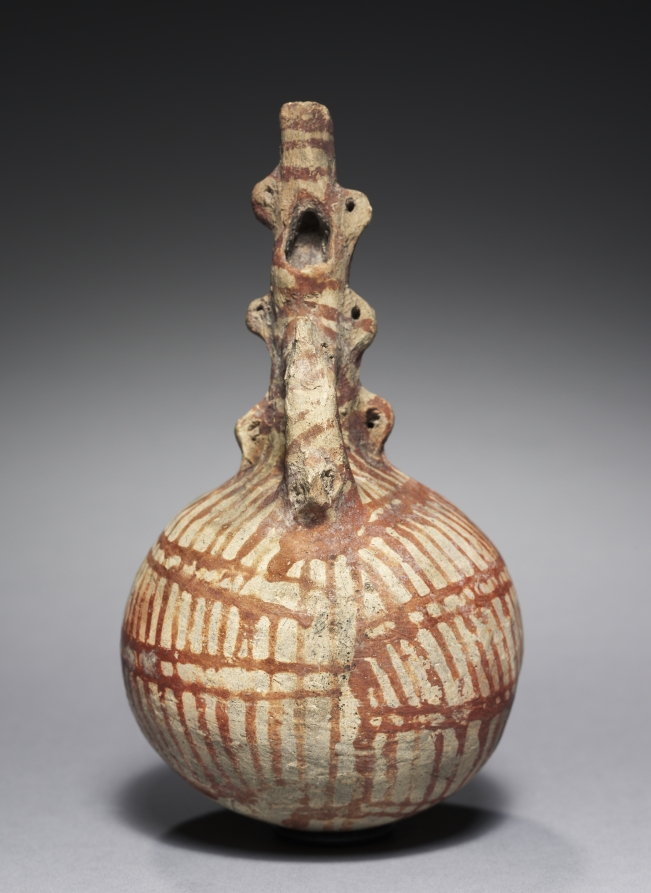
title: Jug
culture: Cyprus, middle Cypriot III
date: c. 1725–1600 BCE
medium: white painted ware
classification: Ceramic